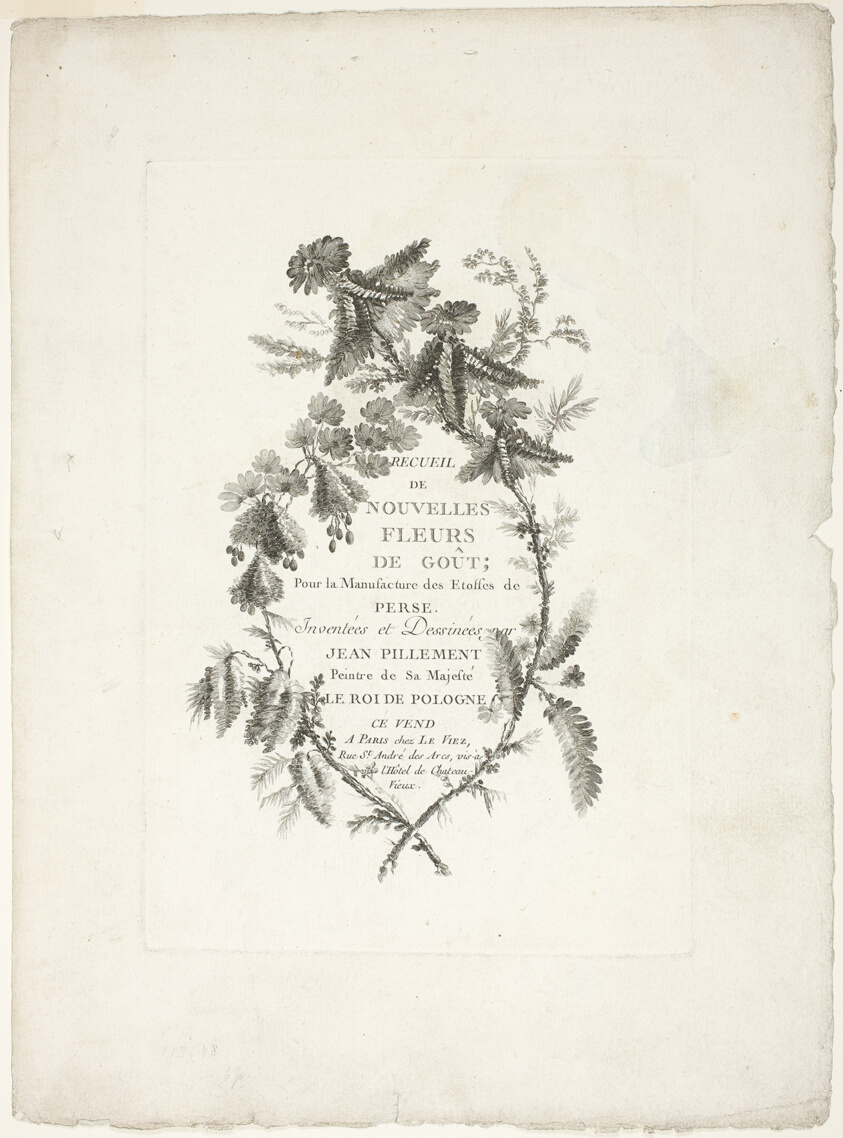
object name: Print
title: Cover for Collection of New Flowers of Taste for the Manufacture of Persian Cloth, Invented and Drawn by Jean Pillement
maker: Johann Heinrich Hess (Germany, born 1746); after Jean-Baptiste Pillement (French, 1728-1808); published by Charles Leviez (French, 1708-1778)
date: 1765/70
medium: Etching on ivory laid paper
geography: Germany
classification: portfolio cover; portfolio; prints and drawing; print